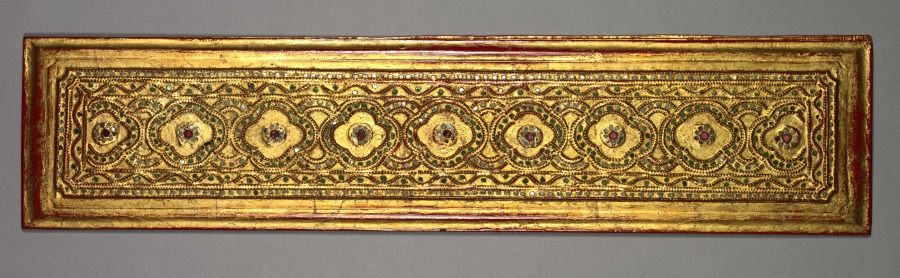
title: Kammavacha: Buddhist Ordination Text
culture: Myanmar (Burma)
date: 1800s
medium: Cover: lacquer, gilding, and glass appliqué on wood; leaves: lacquer and gilding on cloth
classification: Manuscript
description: In premodern Burma, lay people commissioned lavishly ornamented manuscripts for ceremonial occasions, when officiants would read aloud from the text. Written in black lacquer, the text is in the language of Pali written in a Burmese script. It contains ordination rites and procedures for monastic ceremonies. The second to last page is covered with intricately drawn, winged celestial beings (nats) in gestures of praise. They fly amid intertwining vegetation—denoting bounty—that grows from serpentine forms that refer to rain clouds. Lionlike forms inhabit the space with them. The top and bottom covers are equally ornamented with jeweled floral patterning.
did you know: The Pali text of this manuscript is written in Burmese square script, which is also known as "tamarind seed script."